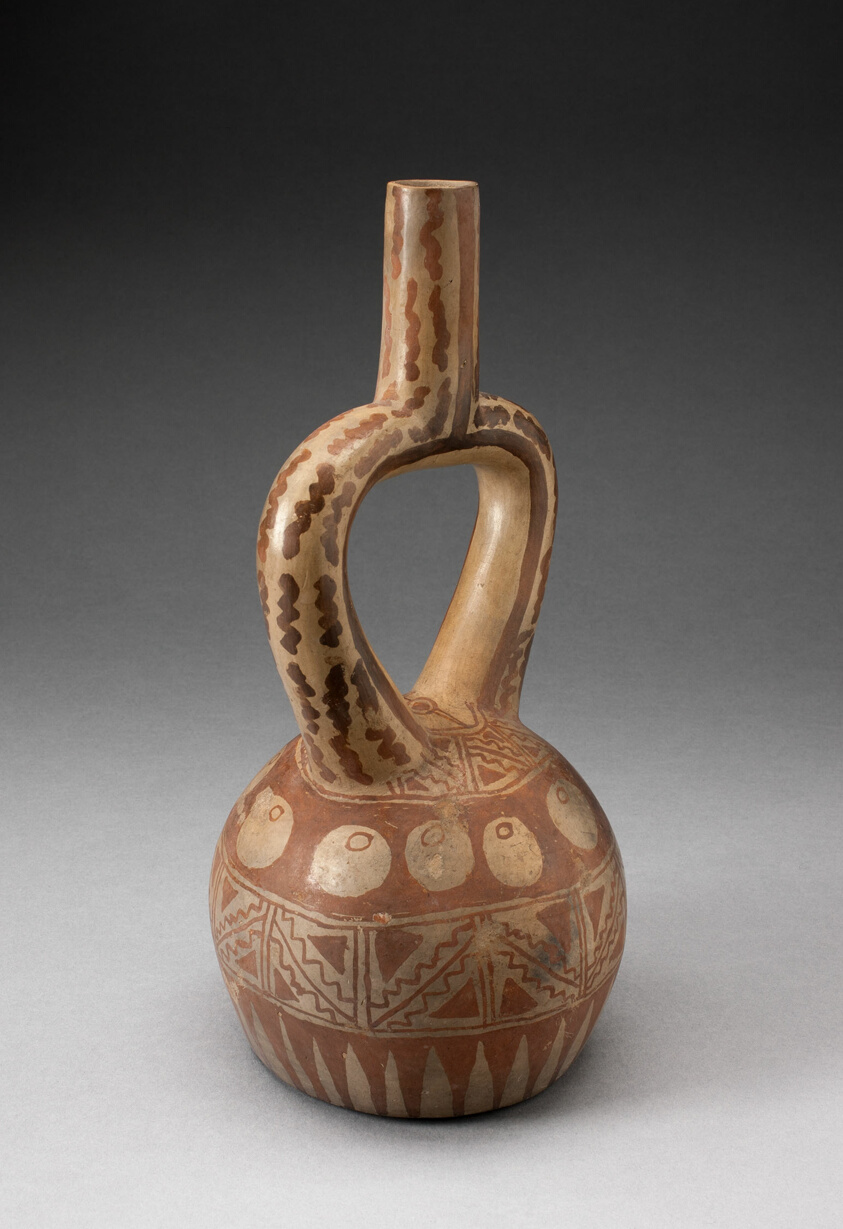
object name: Vessel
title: Stirrup Spout Vessel with Geometric Motifs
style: moche, mochica v, mochica, early intermediate period, Pre-Columbian, americas, Arts of the Americas, andean, andes, south american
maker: Moche (North coast, Peru)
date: 100 BCE–500 CE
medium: Ceramic and pigment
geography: Peruvian North Coast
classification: earthenware; ceramics; vessel; art of the americas